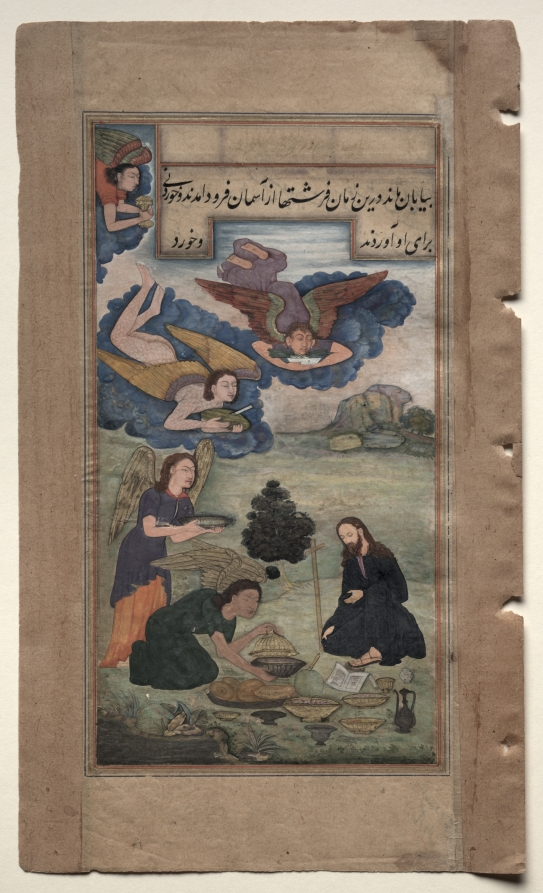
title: Angels bring food to Jesus in the wilderness (folio 55 recto), from a Mirror of Holiness (Mir’at al-quds) of Father Jerome Xavier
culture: Mughal India, Allahabad, made for Prince Salim (1569–1627)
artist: Muhammad Sharif (Indian, active c. 1600)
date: 1602–4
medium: Gum tempera, ink, color, and gold on paper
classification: Manuscript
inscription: Signature of the artist, Muhammad Sharif (Indian, active c. 1600), is written in the tiny pot by Jesus's foot.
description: To end his 40-day fast, five angels brought Jesus refreshments from heaven: breads, melons each with a knife for convenient cutting, fresh leeks, and what appear to be fragrant rice dishes and curries, along with cups of wine. Four of the angels are dressed in robes, and one is clothed only in feathers. After his baptism, Jesus spent 40 days and nights in the desert where he fasted, practiced spiritual exercises, and successfully resisted the temptations of Satan. Many of the rocks in this painting have faces, called grotesques. This page is the only surviving folio from this manuscript that has an artist’s signature, written in the tiny pot by Jesus’s foot.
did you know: The artist has put faces in the rocks, following a Persian convention.